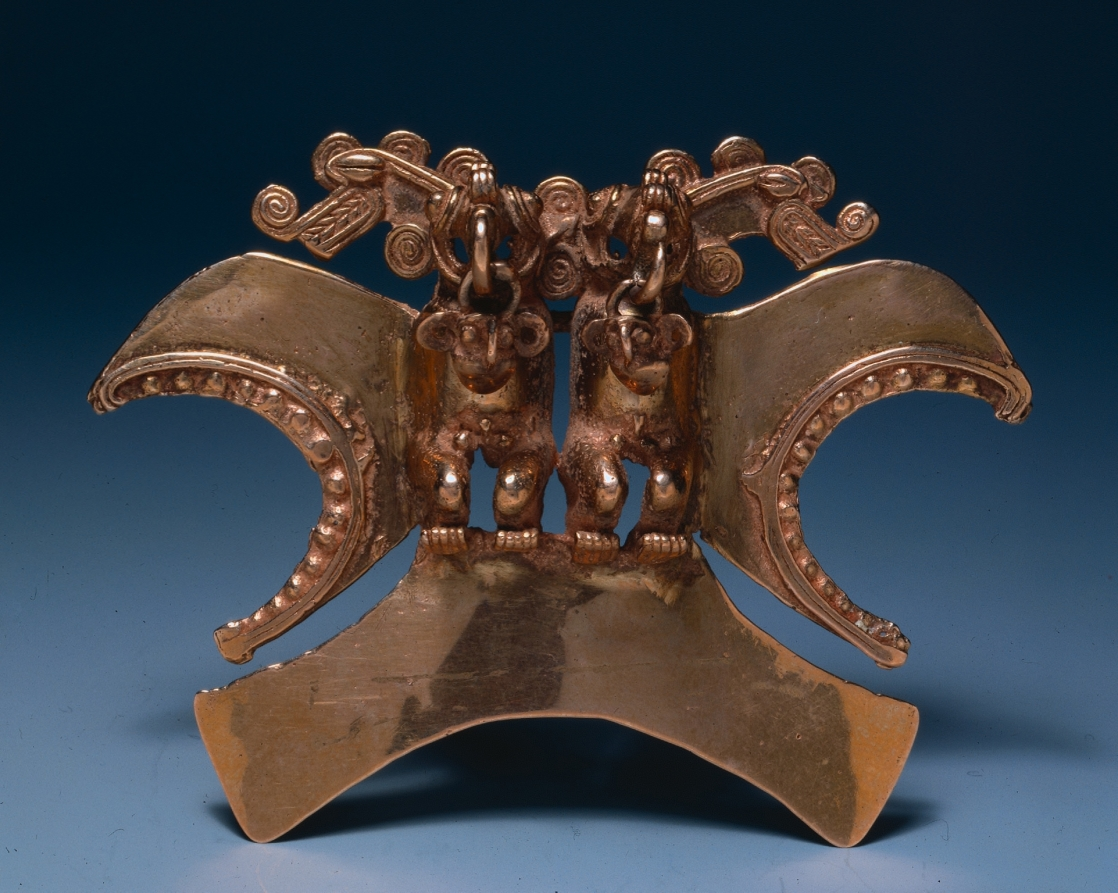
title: Double Bird-Headed Figure Pendant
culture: Costa Rica, Diquís region, 11th-16th century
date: c. 1000–1500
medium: cast and hammered gold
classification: Metalwork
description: Among the pendants shown here are a crustacean (1943.290), an animal-headed figure (1948.18), and two pendants featuring birds (1951.442 and 1946.223). The latter were dubbed aguilas (eagles) by Christopher Columbus, who saw natives wearing them as necklace ornaments. Modern researchers are not as sure of the species shown, but some believe that they are birds of prey because talons and beaks are prominent and often clutch something, in one example here a small, disembodied head that holds a clapper. In both examples, two tufts in the form of crocodiles in profile flank the birds’ heads.